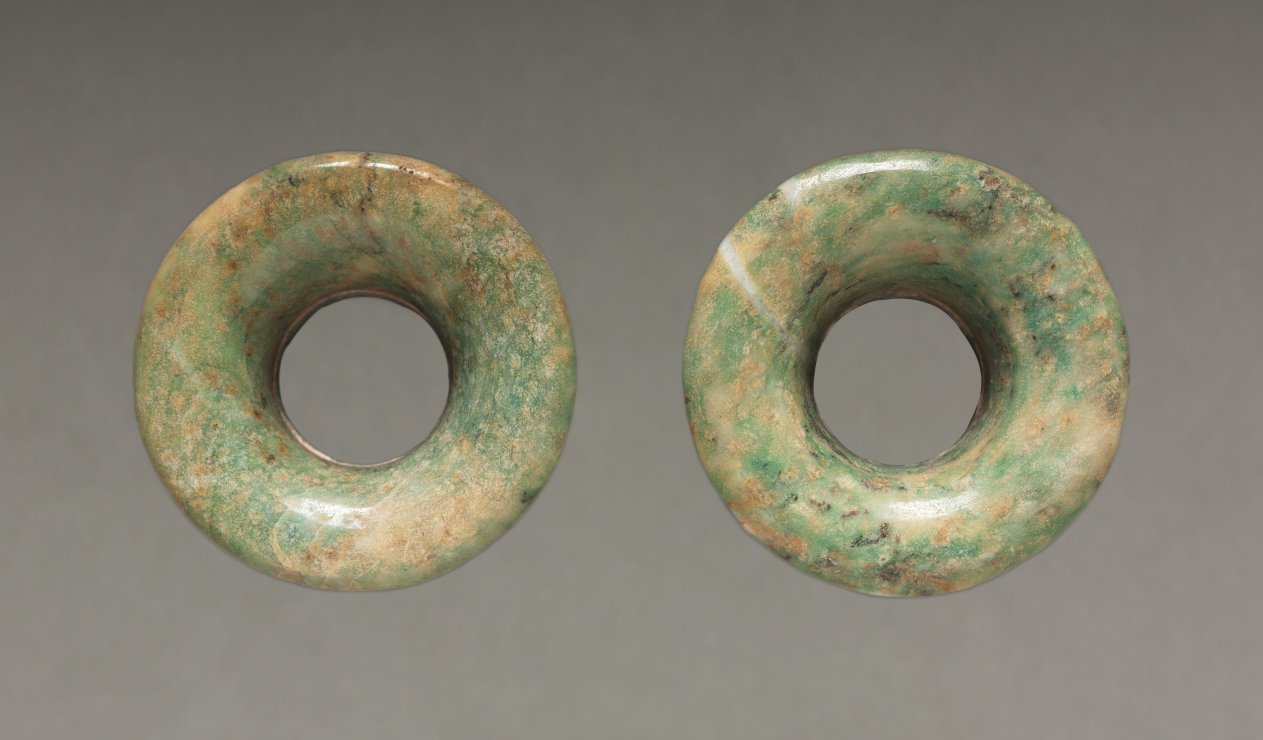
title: Pair of Ear Ornaments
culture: Central Mexico, Teotihuacán style, Classic period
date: 150–200 CE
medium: jadeite-albitite(?)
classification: Sculpture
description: Near Teotihuacán's largest palace is a small temple gorgeously ornamented with green-feathered serpents, symbols of the earth's fertility. Beneath the temple lie at least 120 human sacrifices, most men, many warriors, and some wearing greenstone ornaments like these, perhaps a set. The sacrifices, apparently laid out to mark the cardinal directions, may have consecrated the temple or a ruler's tomb, or both.